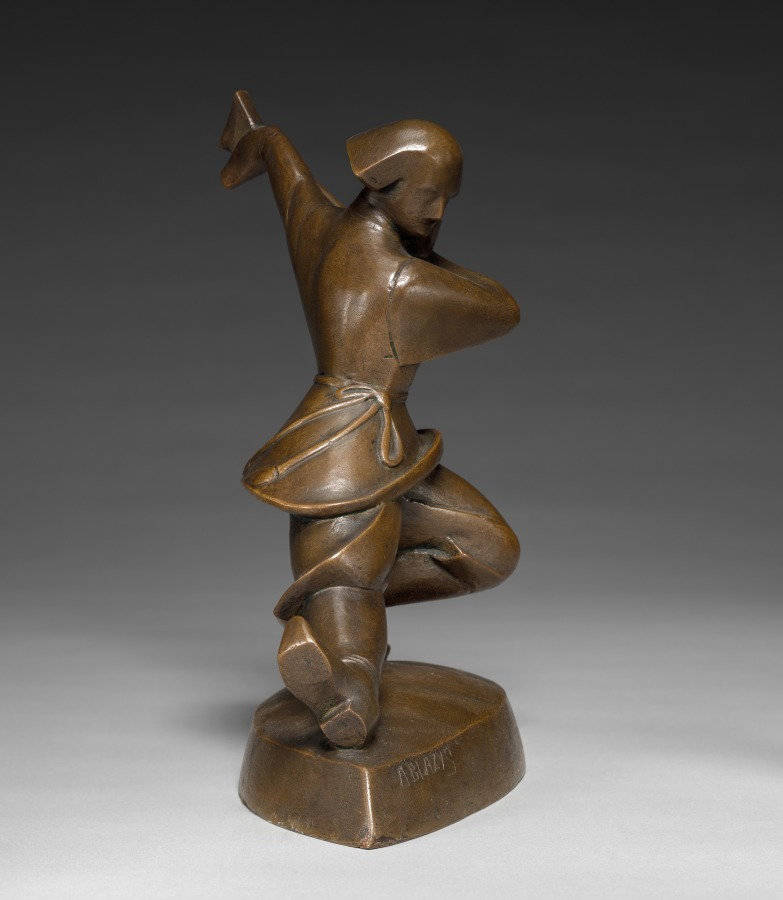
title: Balalaika Player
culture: America, Ohio, Cleveland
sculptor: Alexander Blazys (American, born Russian Empire [now Lithuania], 1894–1963)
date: 1925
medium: bronze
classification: Sculpture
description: A Lithuanian immigrant, Blazys introduced modernist sculpture to Cleveland upon his arrival in 1925. These figures merge rhythmic movement inspired by music with faceted, geometric planes derived from Cubism.